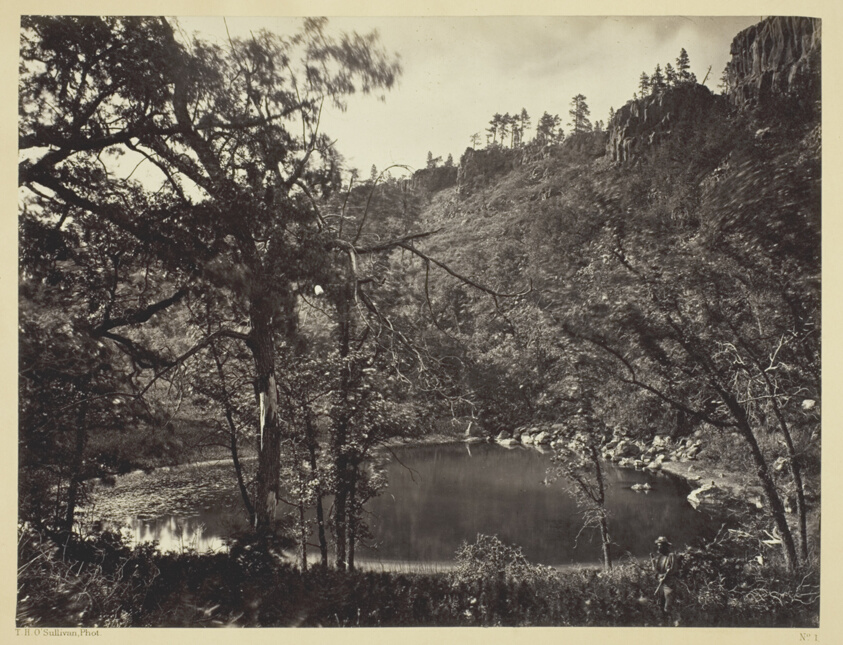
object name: Photograph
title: Apache Lake, Sierra Blanca Range, Arizona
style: 19th century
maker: Timothy O'Sullivan (American, born Ireland, 1840–1882)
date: 1873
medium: Albumen print, from the album "Geographical & Geological Explorations & Surveys West of the 100th Meridian," vol. 1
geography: United States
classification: albumen silver print; photographic process; photography; photograph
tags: Collected by Hugh Edwards